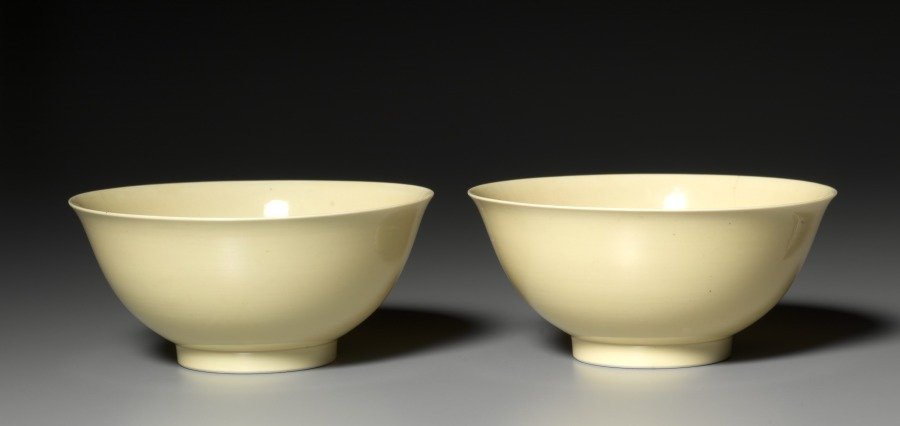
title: Pair of Bowls with Yellow Glaze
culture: China, Qing dynasty (1644-1911), Yongzheng mark and reign (1723-35)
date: 1723–35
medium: glazed porcelain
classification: Ceramic